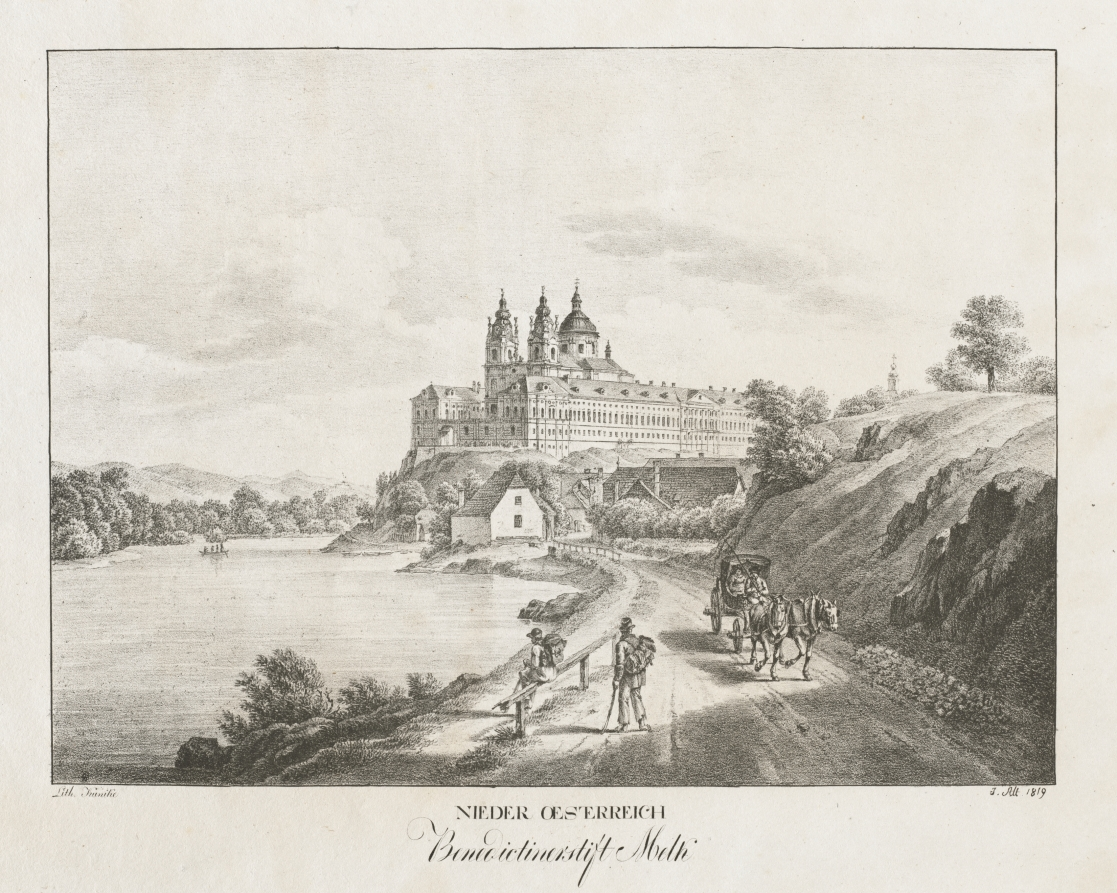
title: Nieder-oesterreich, Benedictinerstift Melk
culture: Austria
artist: Jakob Alt (Austrian, 1789–1872)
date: 1819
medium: lithograph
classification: Print